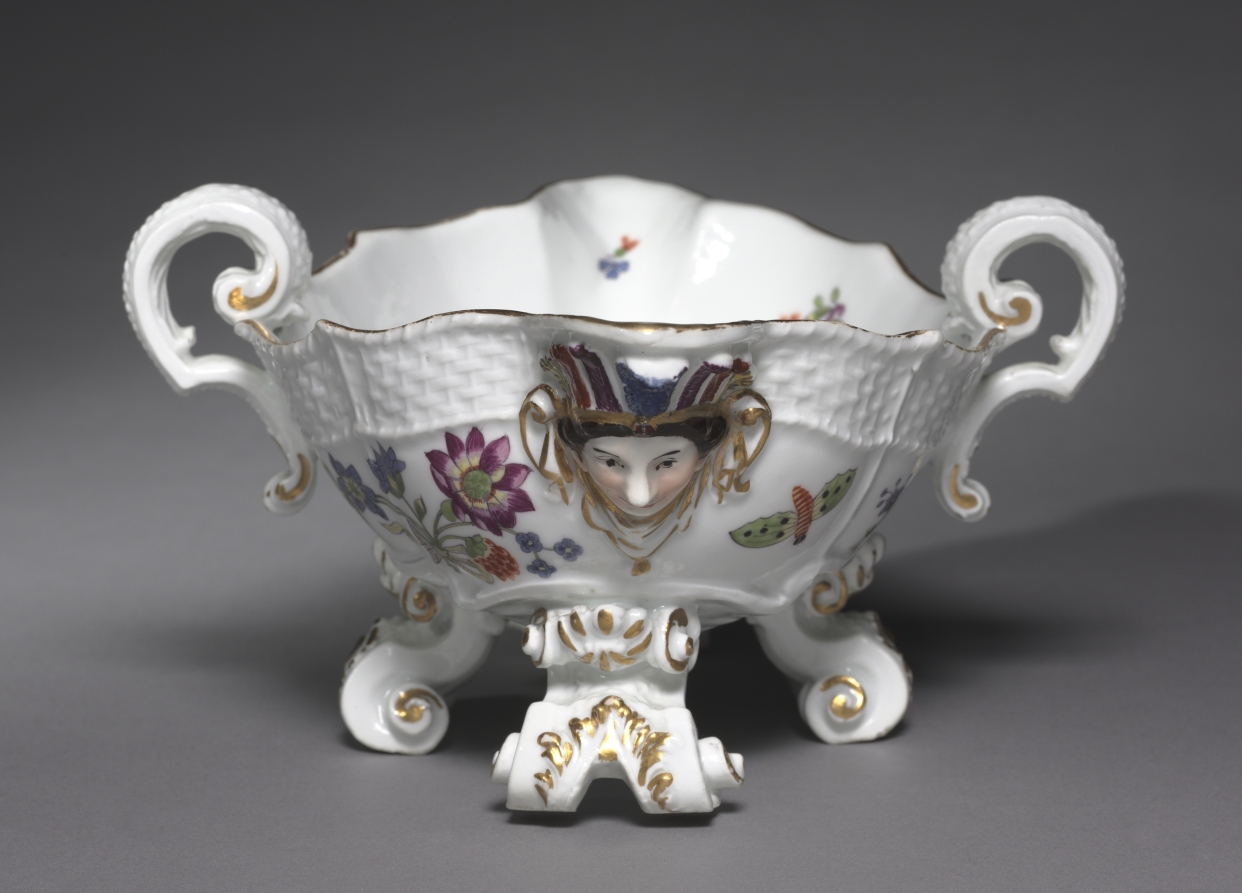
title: Sauceboat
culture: Germany, Meissen, Johann Joachim Kandler period 1735-56, 18th Century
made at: Meissen Porcelain Factory (German, est. c. 1710)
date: 1735–56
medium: porcelain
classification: Ceramic